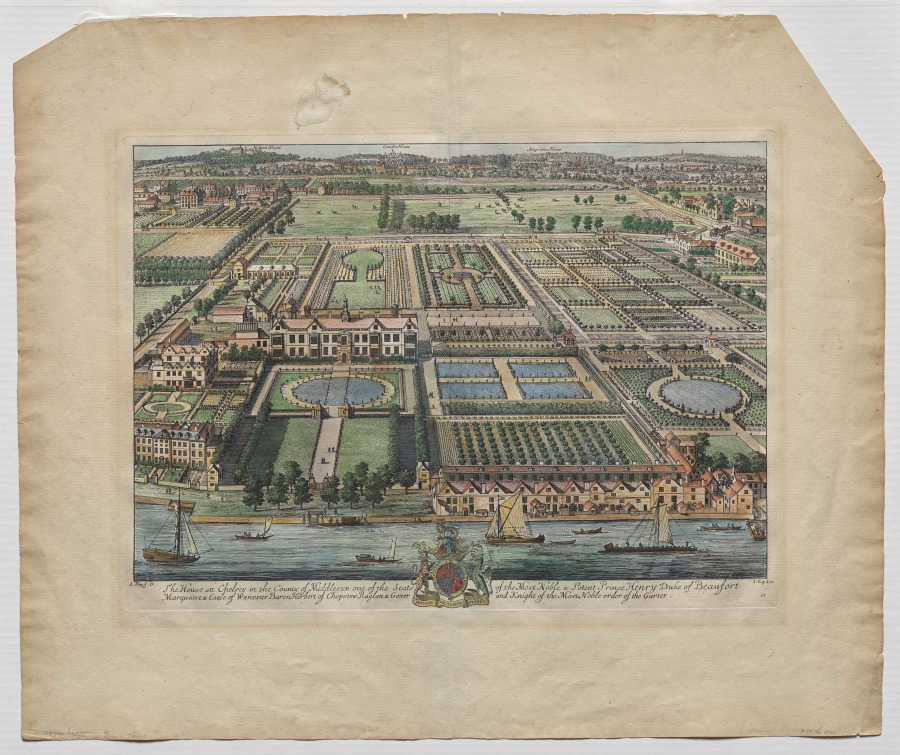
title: Beaufort House, Chelsea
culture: Netherlands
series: Britannia Illustrata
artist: Johannes Kip (Dutch, 1653–1722)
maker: after Leendert Knijff (Dutch, 1650–1721)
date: 1707–9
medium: etching and engraving, hand colored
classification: Print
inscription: In pencil, recto, lower left: "Double page illustration In/Old London [illegible] by Gladys Taylor"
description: This detailed view of Beaufort House in Chelsea portrays the gabled house, built in 1521, and its extensive formal gardens. Part of a large folio publication of the principal seats of the nobility in England, the Britannia Illustrata, it portrays a structure that was once the home of Sir Thomas More and that was demolished in 1740. The two Dutch artists who collaborated on this and the other topographical views in the volume, both resident in England, were exacting in their depictions of the architecture and gardens, providing valuable insight to the land and buildings of the time.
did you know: The house and gardens portrayed in this hand-colored engraving were destroyed in 1740.